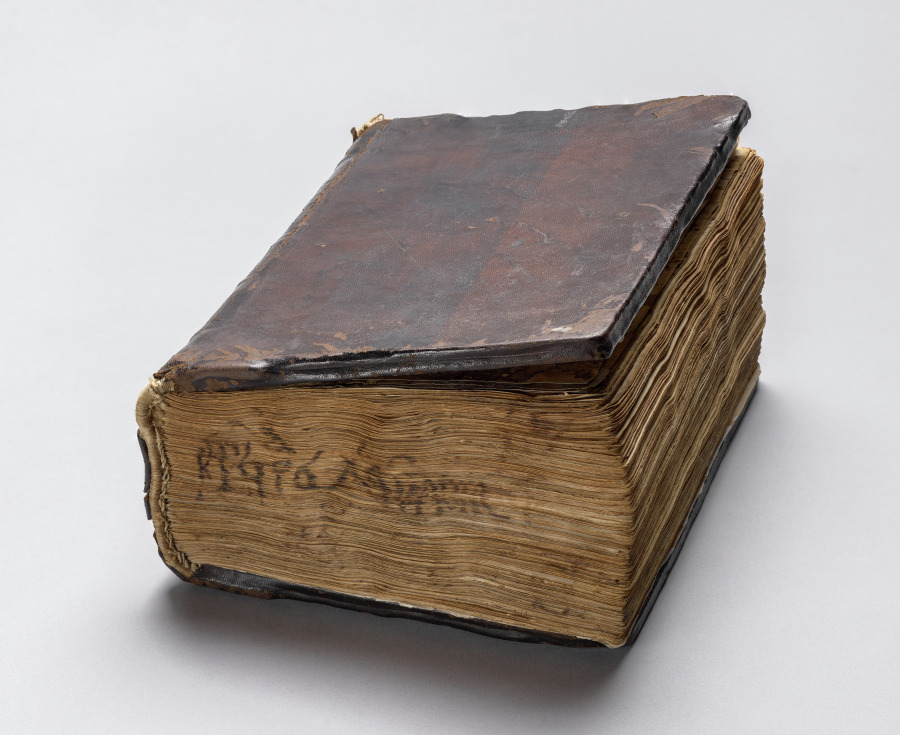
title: Gospel Book with Commentaries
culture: Byzantium, Constantinople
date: c. 1000–1100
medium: ink, tempera, and gold on vellum; leather binding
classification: Bound Volume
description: Each of the four Gospels in this book opens on a page with brilliantly illuminated borders depicting the author of the text as well as birds—principally peacocks, symbols of the immortality of the soul— and fountains, representing the fountain of life and the salvation of the soul. This volume consists of 428 leaves with texts in Greek. Its high level of sophistication is characteristic of monasteries in Constantinople.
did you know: Gospel Books were carried in procession through Byzantine churches.